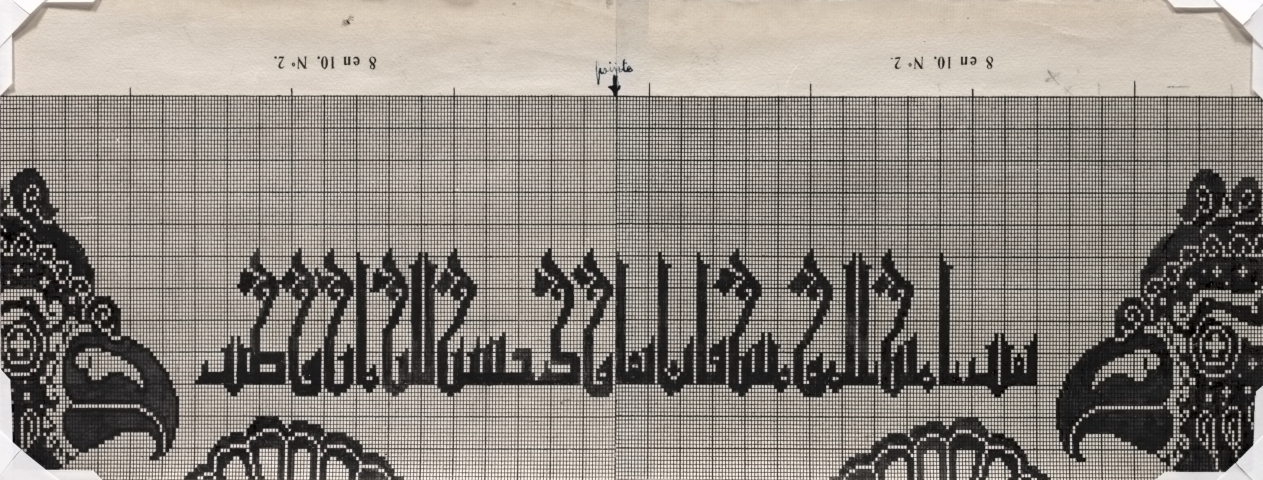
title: Schematic Drawing of Buyid Silk (1962.264)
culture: France, 20th century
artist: Félix Guichert (French)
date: 1900s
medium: ink on paper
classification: Drawing